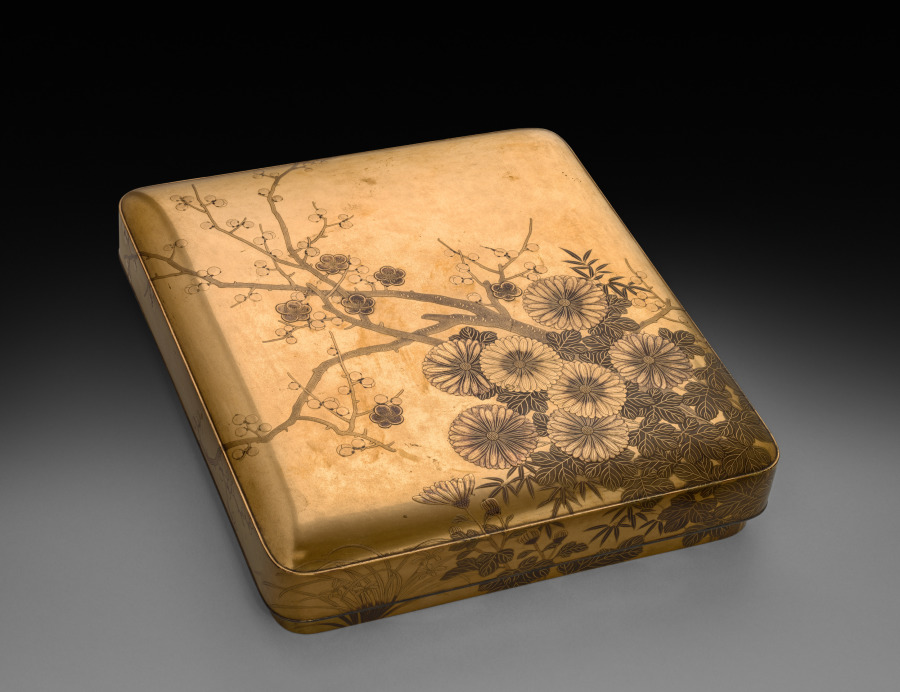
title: Writing Box (Suzuribako) with Chrysanthemum and Plum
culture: Japan, Meiji period (1868–1912)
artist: Sasaki Takayasu (Japanese, 1845–1929)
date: late 1800s-early 1900s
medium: Lacquer over wood with gold and silver sprinkled powder (maki-e)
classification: Lacquer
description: Both functional and elegant, this is a container for an ink stone, brushes, and ink from a set of writing tools that included a larger box for paper. Against a sleek gold lacquered ground, its artist has used restraint in sprinkled powder decoration (maki-e) to produce the design of cockscomb and harvested rice on the interior of the lid.